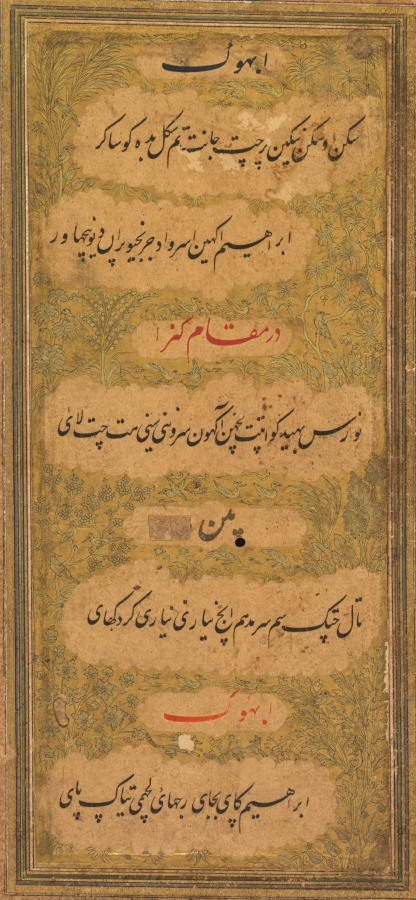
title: From Dohras (Songs) 40 and 42 from the Kitab-i Nauras (Book of Nine Essences) of Sultan Ibrahim Adil Shah II of Bijapur (r. 1580–1627) (recto)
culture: India, Bijapur, Deccan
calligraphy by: Khalilullah Butshikan (Persian, active in India 1596–c. 1620)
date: 1618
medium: ink with two-tone gold on paper, double-sided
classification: Painting